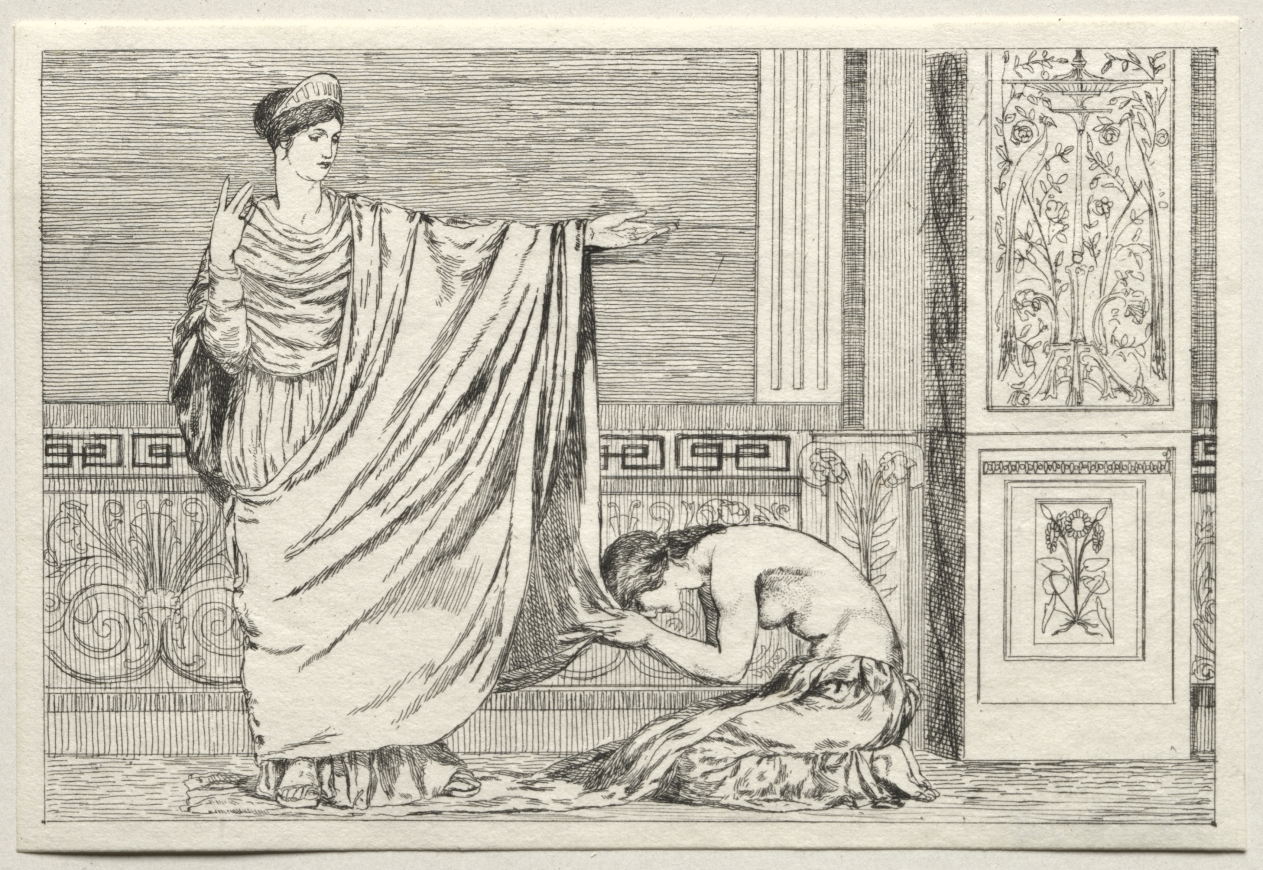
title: Cupid and Psyche: Psyche and Juno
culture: Germany, 19th century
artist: Max Klinger (German, 1857–1920)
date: 1880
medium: etching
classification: Print